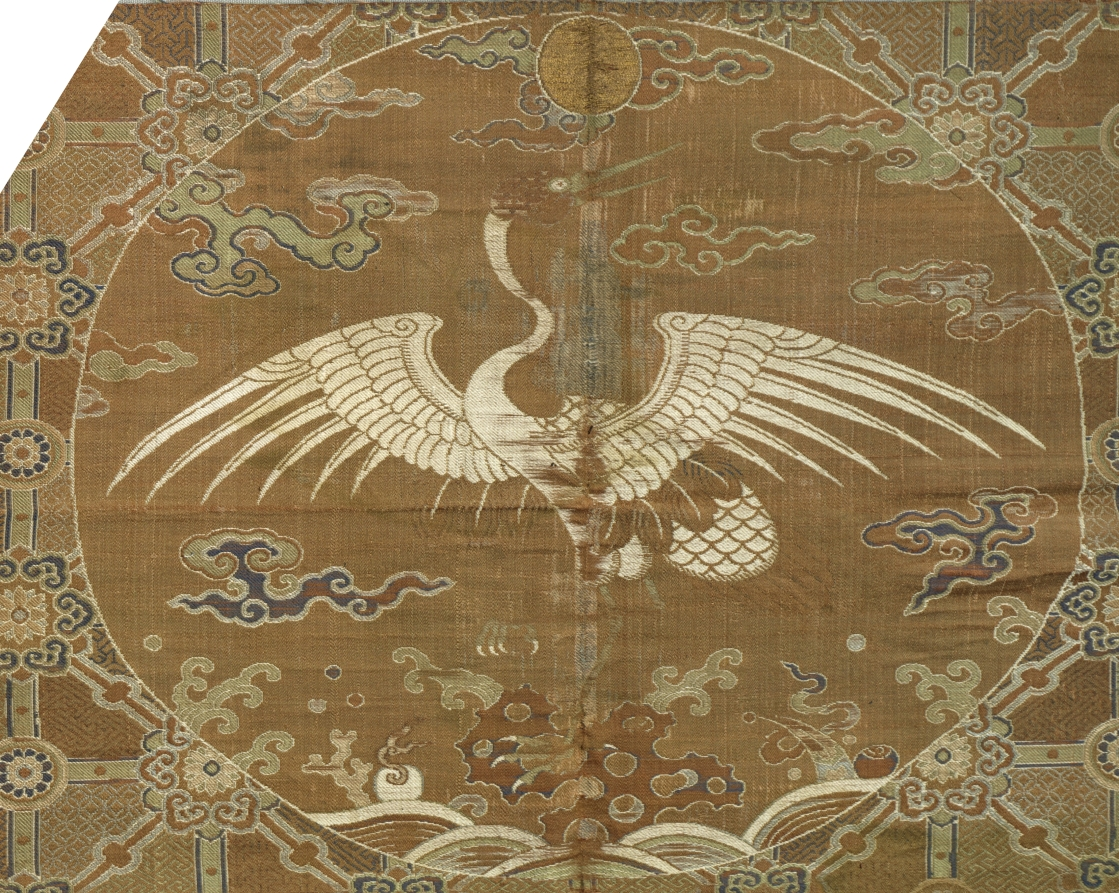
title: Fragment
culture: China, 18th century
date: 1700s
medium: twill ground; silk diasper weave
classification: Textile